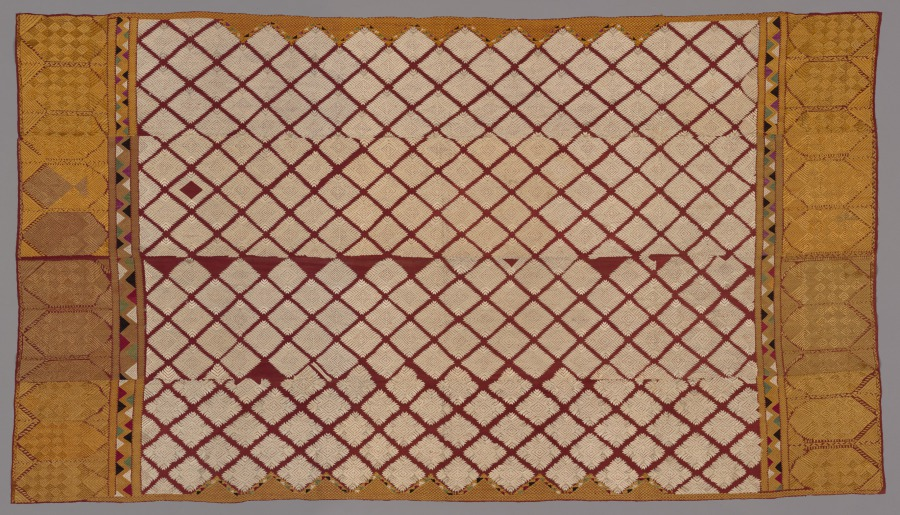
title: Head Shawl ("Phulkari")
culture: India, Punjab, 19th century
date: 1800s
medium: embroidery: silk on cotton tabby ground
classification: Embroidery